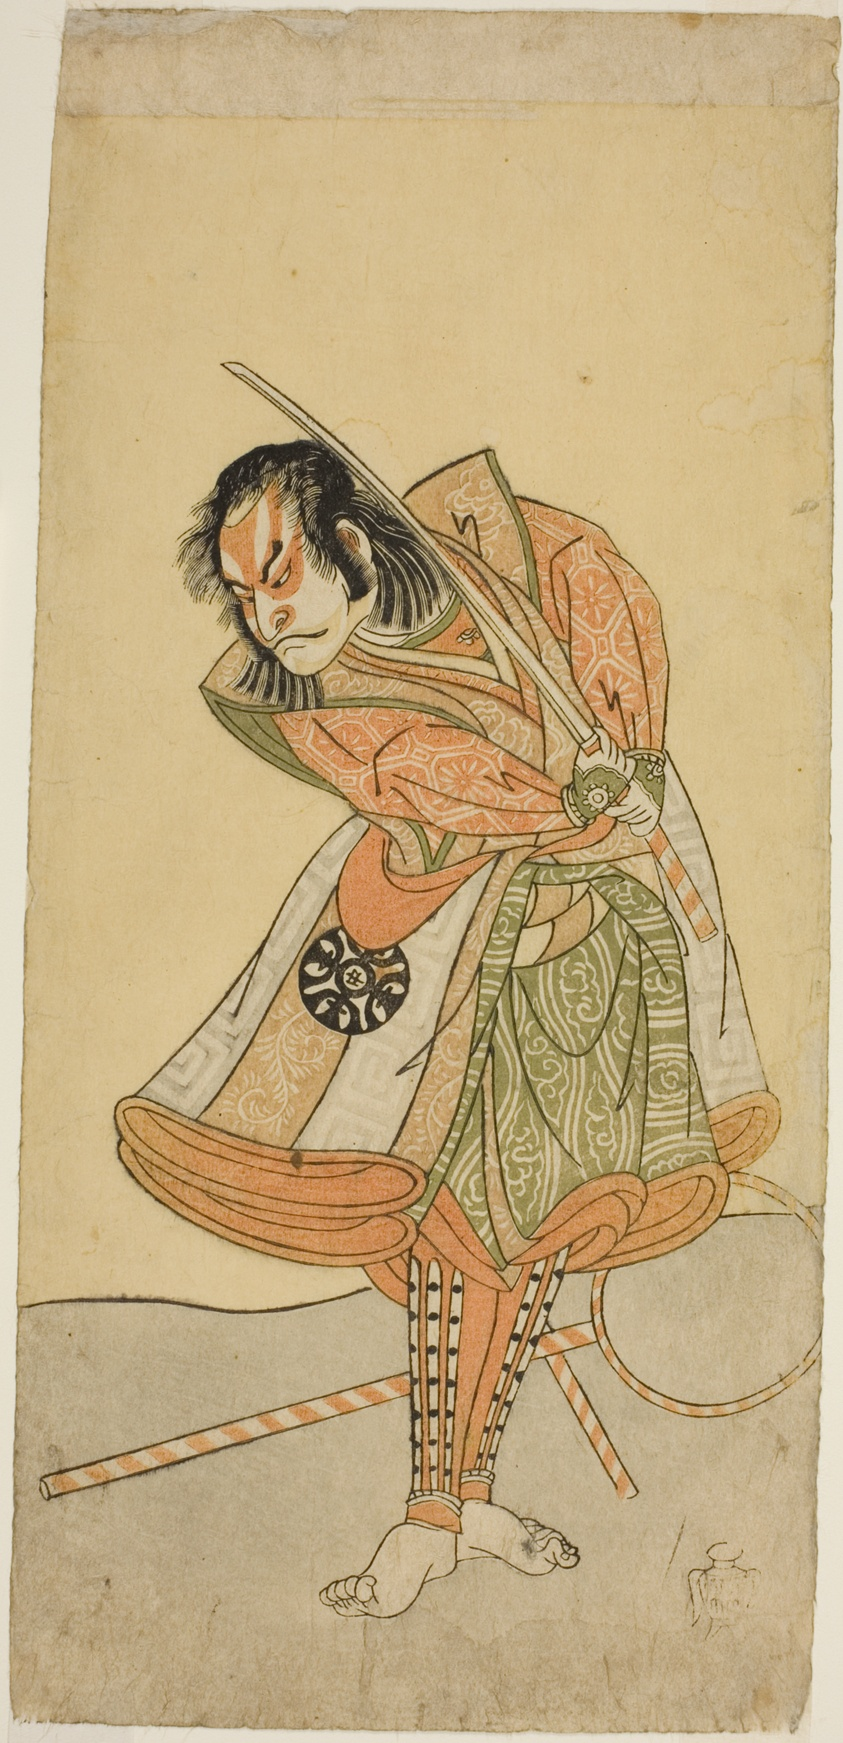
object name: Print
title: The Actor Nakamura Nakazo I as Tezuka no Taro Mitsumori Disguised as the Monkey Trainer Tonkichi Tochibei, in the Play Soga Moyo Aigo no Wakamatsu, Performed at the Nakamura Theater in the First Month, 1769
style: Japanese (culture or style)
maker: Katsukawa Shunsho 勝川 春章; Japanese, 1726-1792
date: c. 1769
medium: Color woodblock print; hosoban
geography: Japan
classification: woodblock print; print; asian art